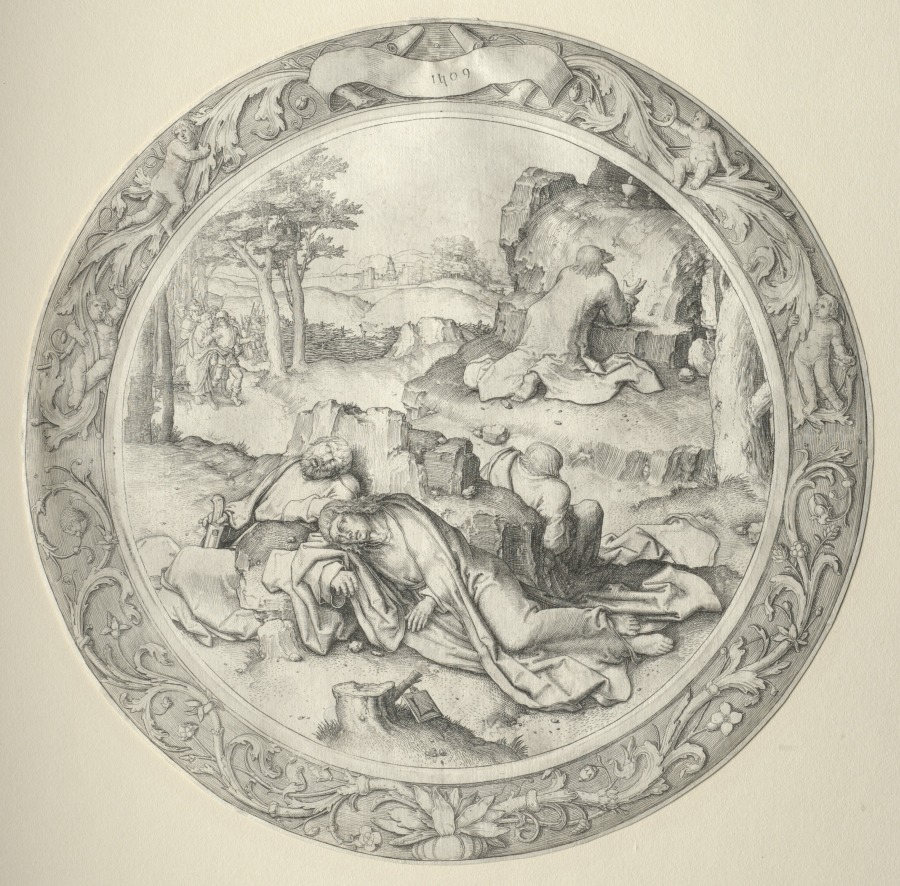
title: The Round Passion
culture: Netherlands, 16th century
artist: Lucas van Leyden (Netherlandish, 1494–about 1533)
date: 1509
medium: engraving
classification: Print